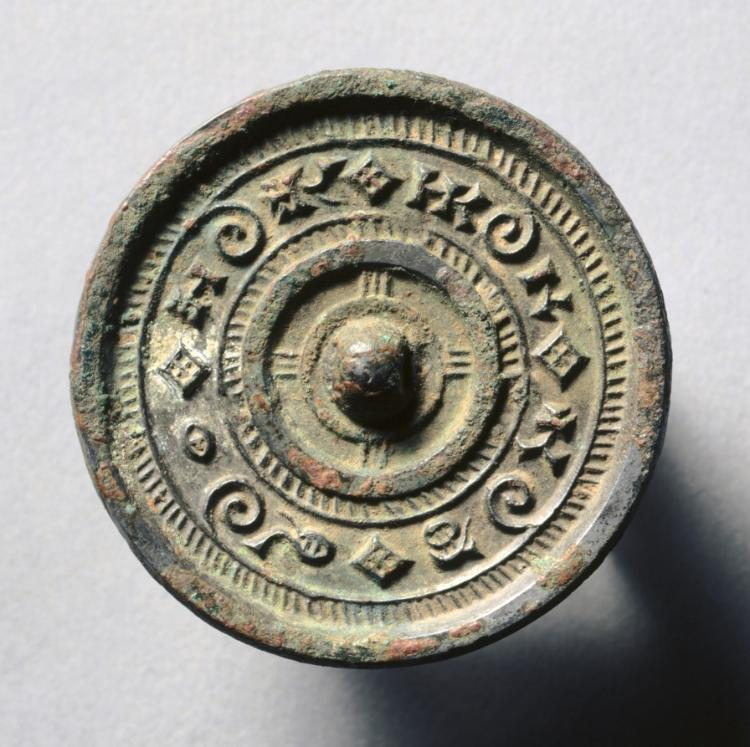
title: Mirror with Concentric Circles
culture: China, Western Han dynasty (206 BCE–8 CE)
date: late 300s BCE–50 CE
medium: bronze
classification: Metalwork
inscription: By the light of the sun, the world is made bright.